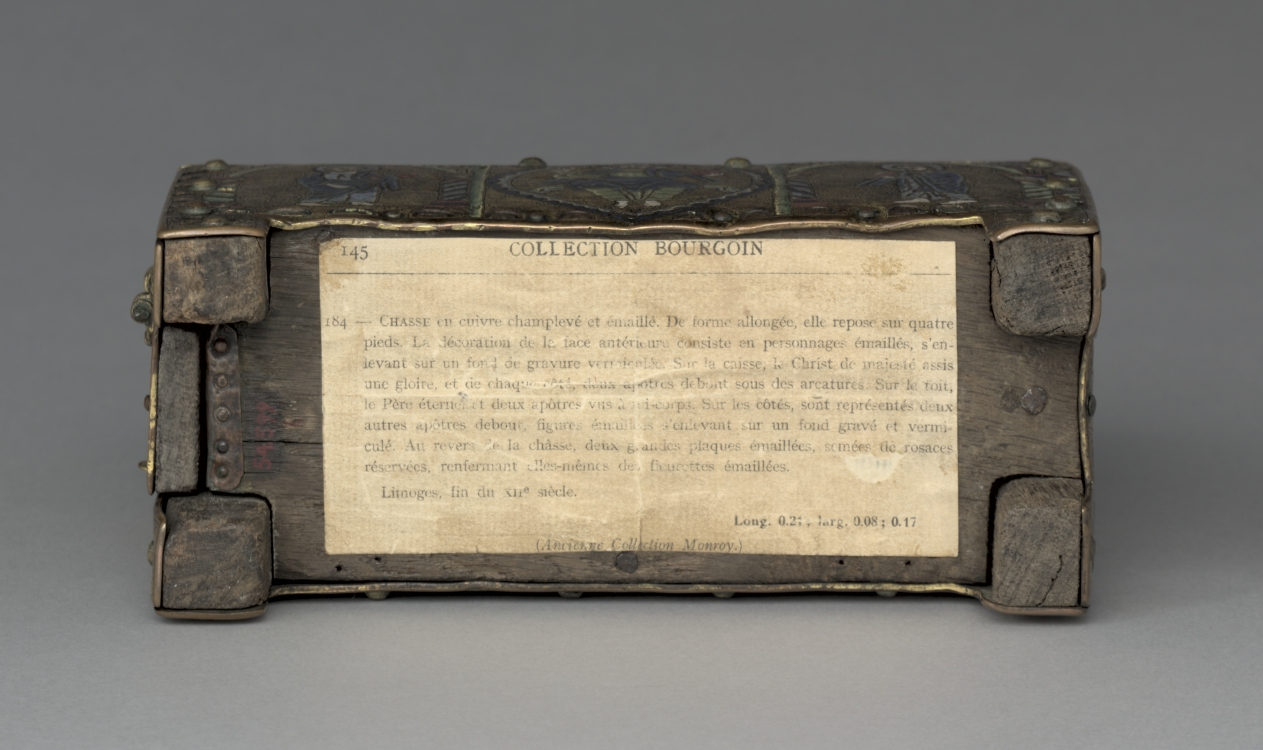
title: Chasse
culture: France, Limousin, Limoges, Gothic period, first half of 13th century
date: 1200–1250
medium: copper: gilded, engraved, chased; champlevé enamel; wood core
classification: Enamel